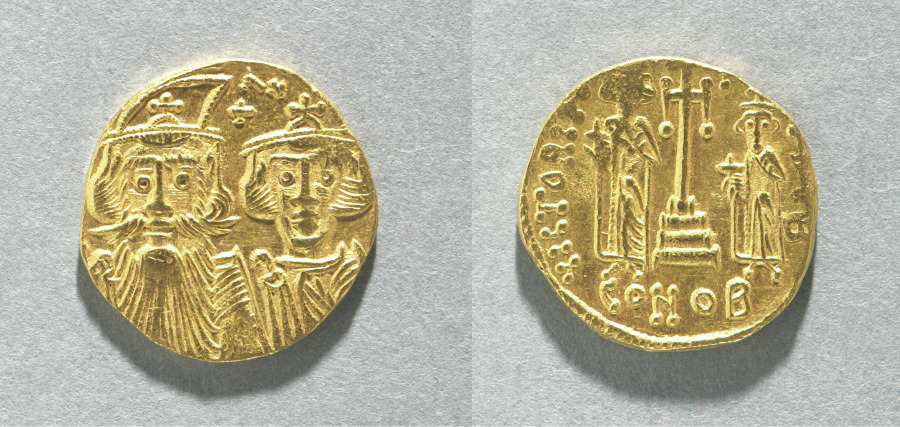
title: Solidus of Constans II and Constantine IV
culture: Byzantium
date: 659–661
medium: gold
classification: Coins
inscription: VICTORIA AVGU and officina letter (cut off and incomplete)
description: The vast number of surviving Byzantine coins attests to the level of trade across the empire. Controlled and supervised by the emperor, the producers of coins took care to represent his authority and reflect his stature. Talented artists were recruited to engrave the dies (molds) used for the striking of coins. Emperors increasingly came to include their heirs and co-emperors on their coinage, as well as other family members or even earlier rulers. Coins were recognized, then as now, as small, portable works of art. With their inscriptions and images, Byzantine coins provide valuable documentation of historical events and a record of the physical appearance of the emperors. The coin shown here is the solidus, the basic gold coin of 24 karats.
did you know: The emperor depicted on the left was also known as "Constantine the Bearded."